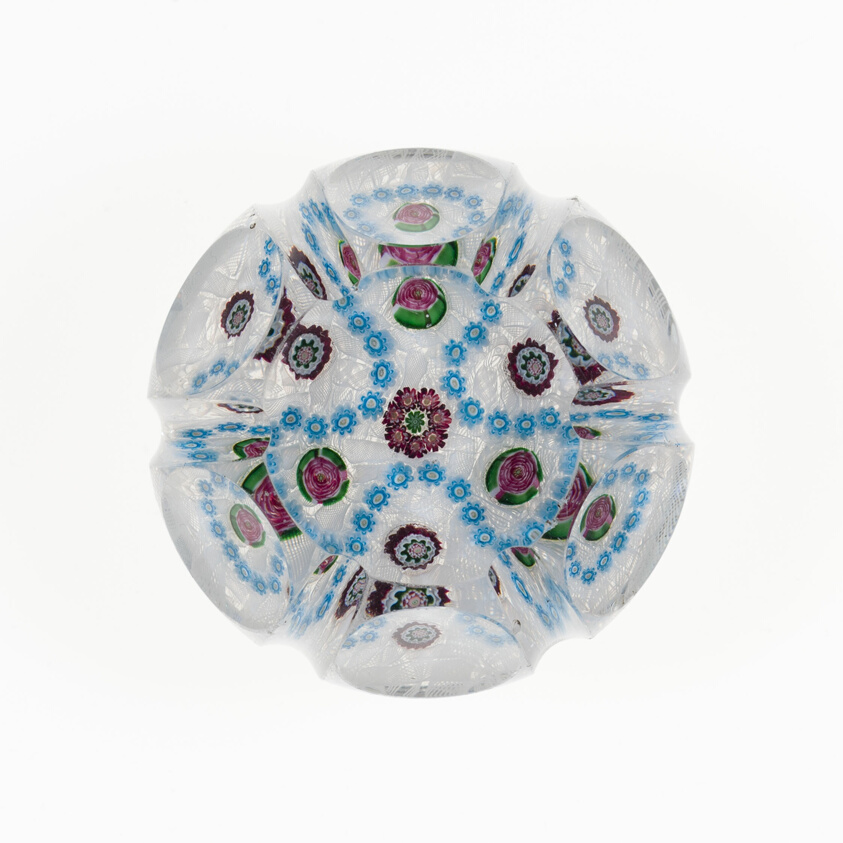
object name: Glass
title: Paperweight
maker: Clichy Glassworks (Cristalleries de Clichy); Clichy, France, 1837-1885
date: 19th century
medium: Glass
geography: Clichy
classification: paperweight; millefiori; european decorative arts; glass